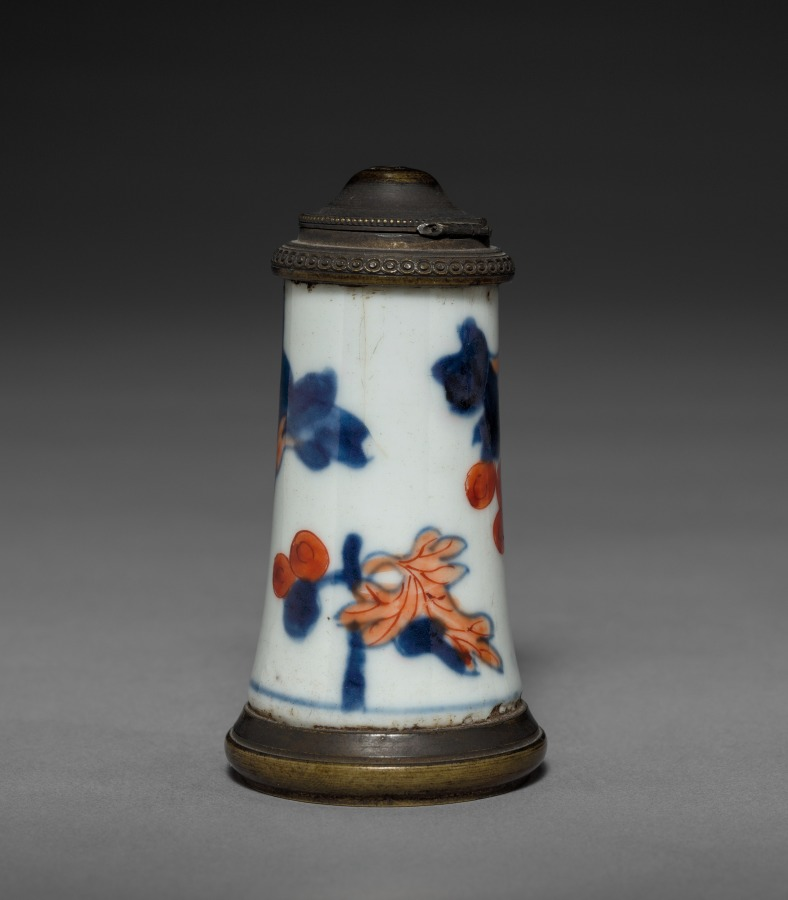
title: Imari Ware (?) Container with Brass Mounts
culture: Japan, Edo period (1615–1868)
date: late 1600s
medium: porcelain with brass mounts (possibly Hizen ware, Arita type, Imari style)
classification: Ceramic